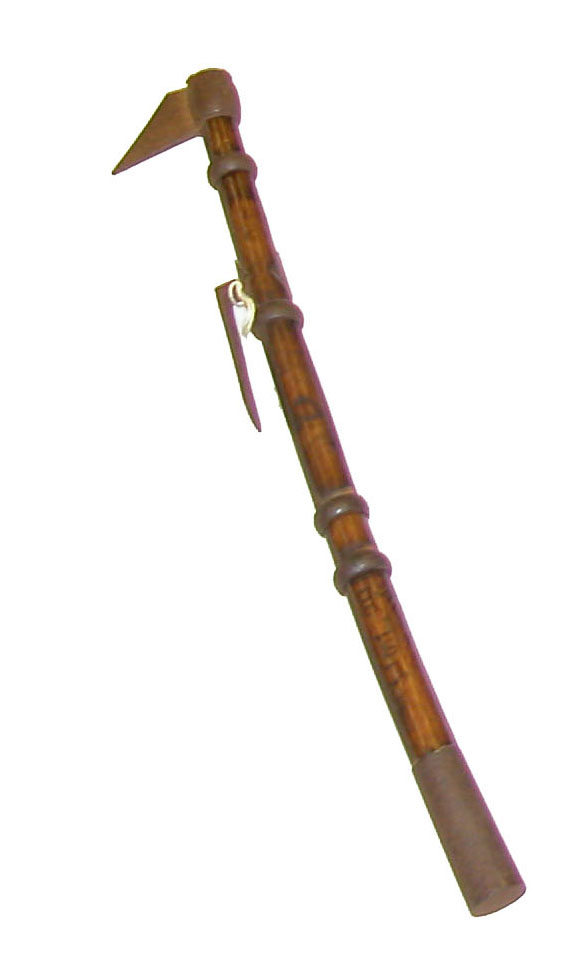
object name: Textile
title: Fireman's Pick Ax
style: edo (japanese period), Japanism, East Asian, asian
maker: Japan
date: Edo period (1615–1868), 1600/1868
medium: Wood and iron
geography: Japan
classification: textile; accessories (object genre)